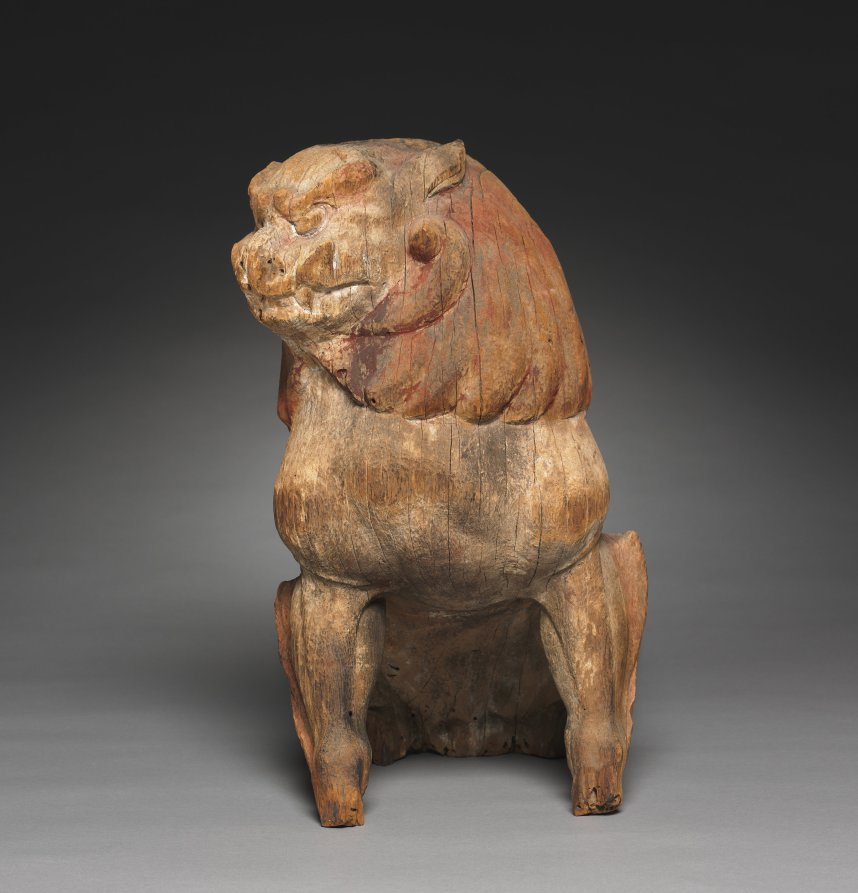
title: Guardian Animal: Komainu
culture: Japan, Kamakura period (1185–1333)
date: 1300s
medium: Wood with traces of color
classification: Sculpture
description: Placed at the entrance to shrines and temples in Japan, guardian figures ward off evil spirits. These guardians used to be painted red and white and are distinguishable by their facial expressions: the open-mouthed animal is a karashishi, or “Chinese lion,” while the close-mouthed beast, which once had a single horn protruding from its head, is called a komainu, or “Korean dog.” The mouths correspond to infinity, the syllables ah (open) and um (closed), or the alpha and omega. This pairing was widespread in ancient times in Chinese territories and likely found its way to Japan via kingdoms in Korea.